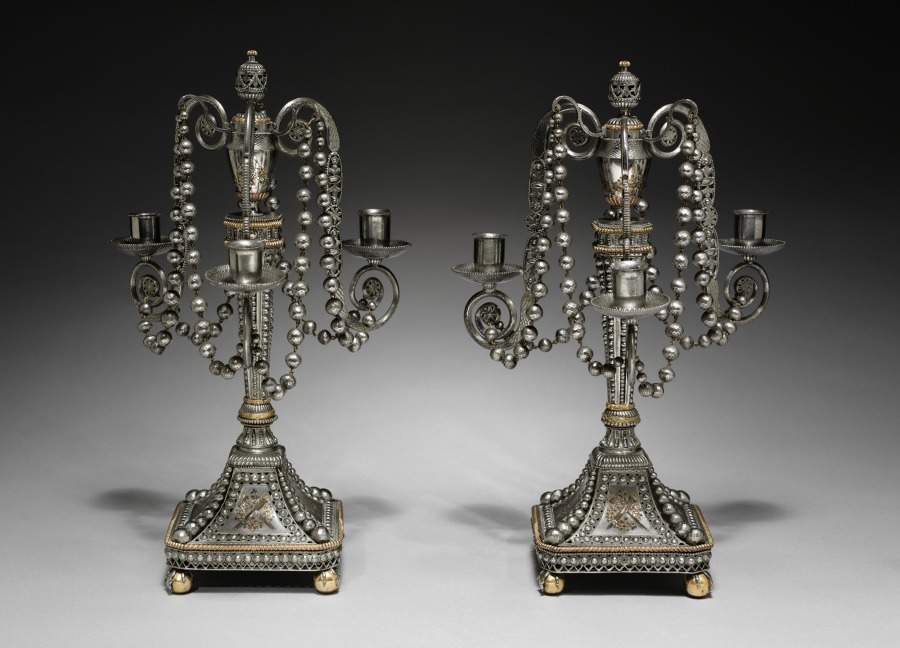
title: Pair of Candelabra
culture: Russia, Tula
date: c. 1790–95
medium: cut and polished steel with gold and silvered decoration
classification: Metalwork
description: Founded in 1705 by Peter the Great, the armory at Tula developed steadily over the 18th century to become the center of Russian metalworking, especially in arms manufacturing. In the 1770s and 1780s, Catherine the Great took a keen interest in the work produced there, sending several of the most proficient craftsmen to England to study the decorative application of steel in armories in Sheffield and London. Subsequently, the Tula artisans surpassed the metalworkers in Britain and elsewhere in Europe, producing decorative wares that were as precious and precise as their brilliantly embellished firearms. Empress Catherine was so pleased that she commissioned diplomatic and royal gifts of Tula ware as well as several noted examples of furniture in the distinctive Tula style of cut steel, gilt-bronze, silver, and gold. The most recognizable characteristic of Tula ware was the use of beads of steel that replicated faceted diamonds and crystals. No other region was able to achieve the vividness of this technique in cut steel. Most works in Tula steel were small and precious such as inkstands, bobbin holders, buttons, footstools, single candlesticks, etc. These candelabra typify the Neoclassical taste in Russia during the late 1700s, a significant moment in Russian design because of the mature level of craftsmanship and style.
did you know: Decorative works in steel like this pair of candelabra were made by gun makers in the town of Tula, Russia, to impress the empress, Catherine the Great.